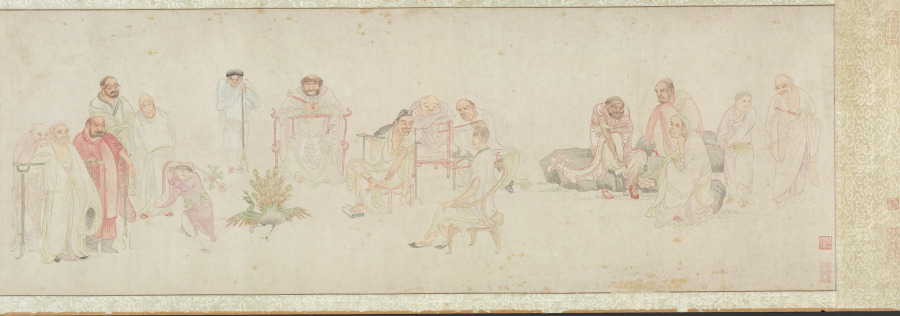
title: The Five Hundred Arhats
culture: China, Ming dynasty (1368–1644)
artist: Wu Bin (Chinese, active c. 1591–1626)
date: 1591–1626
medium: Handscroll; ink and color on paper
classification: Painting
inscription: 枝隱頭陀吳彬齋心拜寫 [印]吳彬之印; 文中父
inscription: 7 seals of Qianlong emperor (r. 1736–95): Gu xi tian zi 古希天子; Shou 壽; Qianlong jian shang 乾隆鑑賞; San xi tang jing jian xi 三希堂精鑑璽; Yi zi sun 宜子孫; Tai shang huang di zhi bao 太上皇帝之寳; Qian qing gong bao 乾清宮寶.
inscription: 6 seals of Cheng Qi 程琦 (1911–1988): Ke an geng zi wu shi yi hou suo de ming ji 可菴庚子五十以後所得名跡; 5 other Cheng Qi seals.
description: More than 66 feet long, this handscroll depicts 447 luohans, 72 attendants, and the bodhisattva of compassion at its very end. Luohans (arhats in Sanskrit), disciples of the Buddha and protectors of the Buddha’s law, possess supernatural powers and take on myriad external appearances. The amusing assortment of characters are engaged in an array of religious, secular, and miraculous activities. The painter used stylistic features borrowed from earlier artists, carefully controlled lines, and refined coloring. Wu Bin was a lay Buddhist and depicting this sort of image was part of a religious practice seeking understanding of the Buddha’s teaching.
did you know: Far advanced on the path to enlightenment, arhats have the capacity to tame tigers, free dragons, and to float on water or in the air.